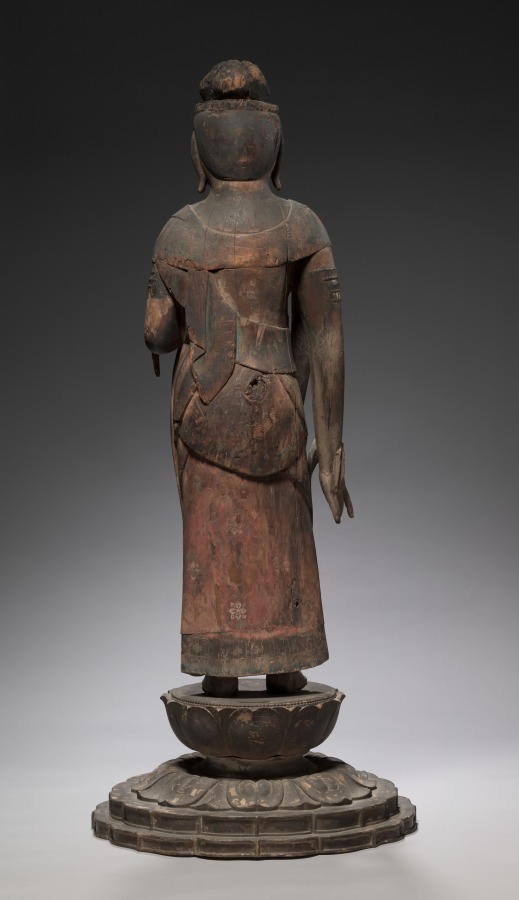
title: Shō Kannon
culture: Japan, Heian period (794–1185)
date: 900s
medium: Wood with traces of color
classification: Sculpture